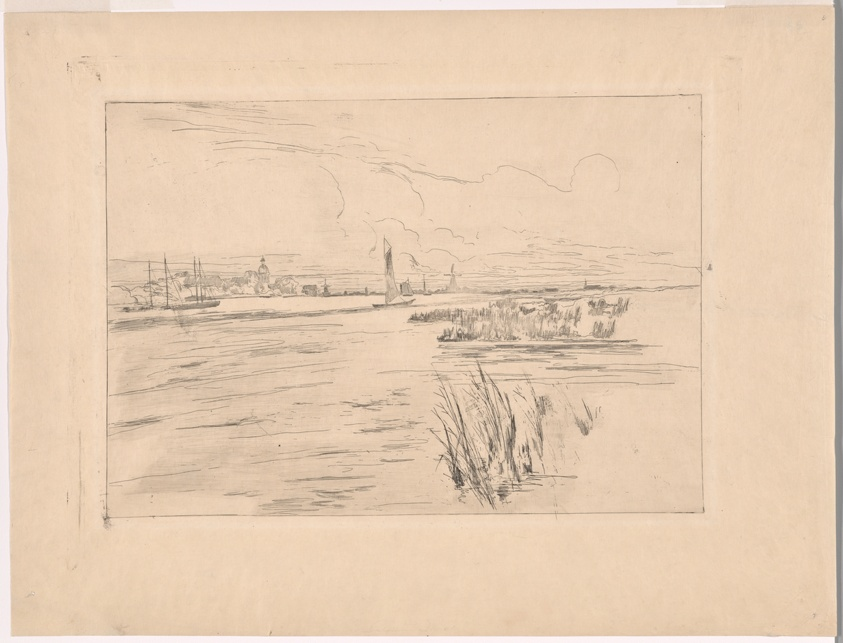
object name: Print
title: Holland Dykes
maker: John Henry Twachtman (American, 1853-1902)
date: 1885/88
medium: Etching and drypoint in black on cream Japanese paper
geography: United States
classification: prints and drawing; paper; print; etching